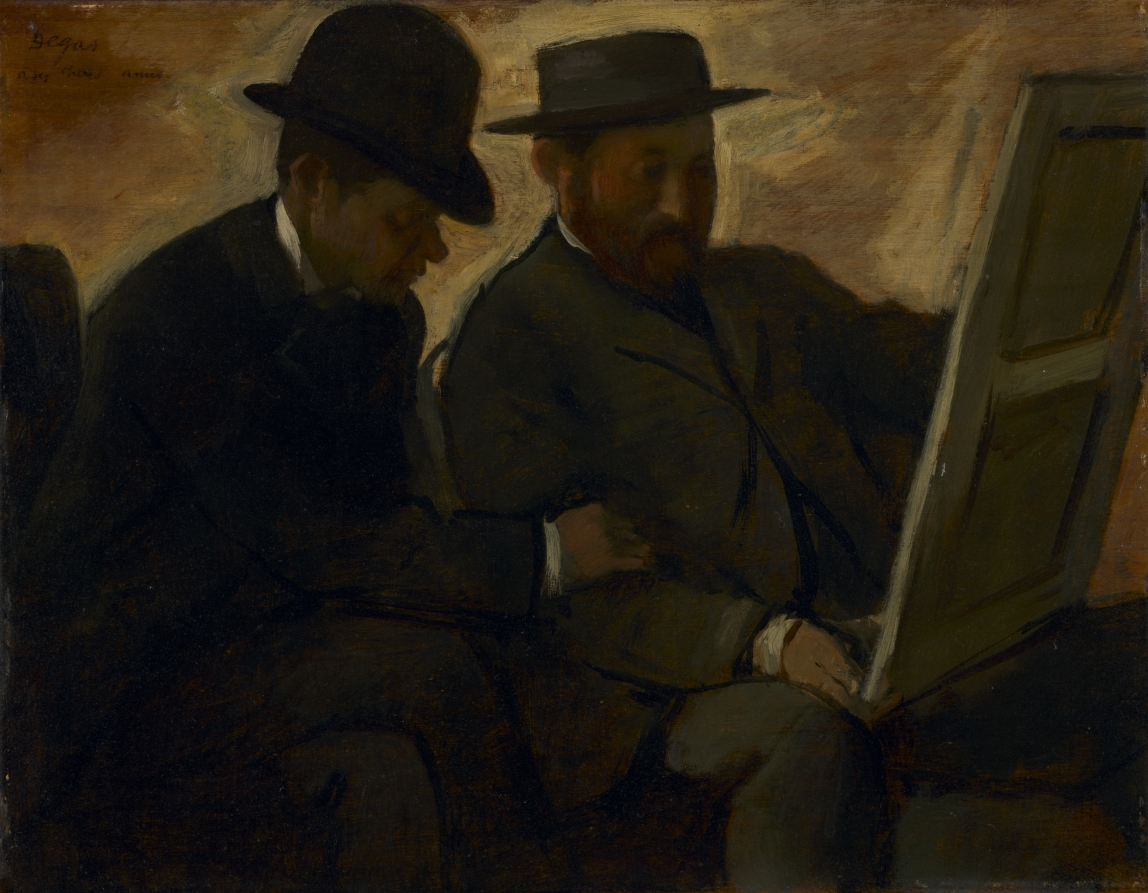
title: Paul Lafond and Alphonse Cherfils Examining a Painting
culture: France, 19th century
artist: Edgar Degas (French, 1834–1917)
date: c. 1878–80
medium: oil on wood panel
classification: Painting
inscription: Signed in upper left: Degas / a [sic] ses chers amis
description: The upper left corner of this painting bears a dedication by Degas "to his dear friends." The double portrait depicts Paul Lafond (left), future curator of the art museum at Pau, in southwestern France, and Alphonse Cherfils (right), an art collector and defender of the Impressionists. Through the influence of these friends, Degas's works were selected for the annual exhibitions of the Société des Amis des Arts (Society of Friends of the Arts), and his painting, A Cotton Office (1873), was the first by the artist to be purchased by a museum. Since the painting held by the two men is probably by Degas, this intimate image commemorates both personal and business relationships.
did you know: The gentlemen in this painting had close relationships with many Parisian artists and would go directly to their studios to purchase works that they wanted to exhibit or sell.